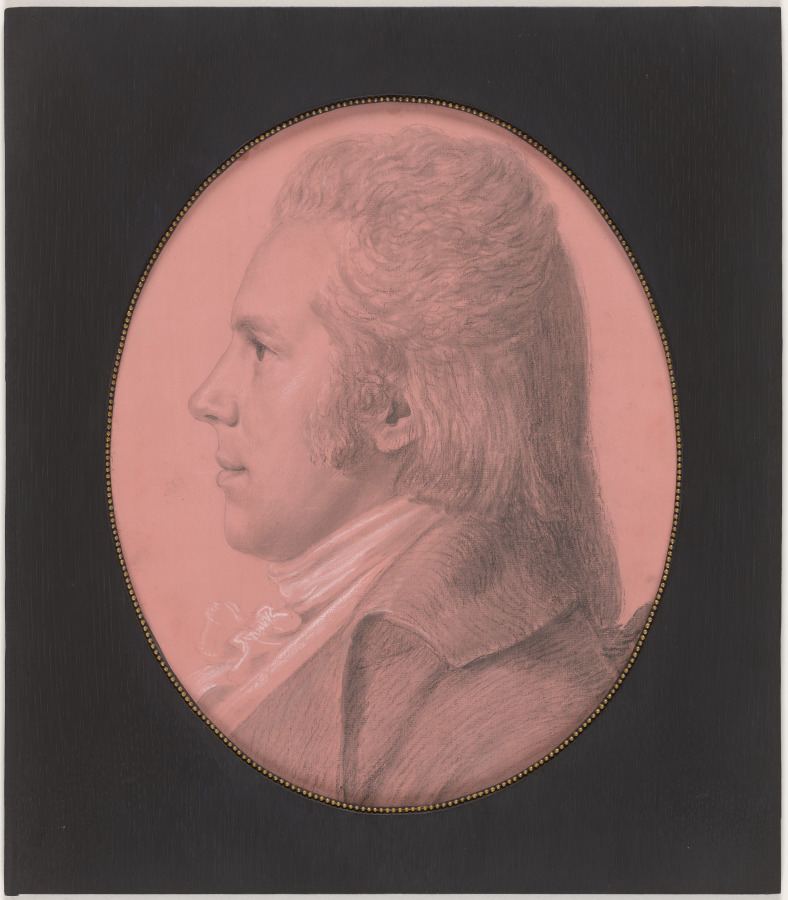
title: Portrait of Georges Arnold Fitzwilliam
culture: France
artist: Charles Balthazar Julien Fevret de Saint-Mémin (French, 1770–1852)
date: c. 1790–1852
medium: Black and white chalk on buff paper with pink wash in original frame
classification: Drawing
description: This portrait and its pair (2024.35.2), depict George Fitzwilliam, an English merchant, and his American wife Eleanor Ramsay Fitzwilliam, who sat in New York for the French émigré artist Charles Balthazar Julien Févret de Saint-Mémin. Saint-Mémin used a recently invented mechanical device called a physiognotrace to trace accurate profiles of his sitters, which he then completed in black and white chalks. The technology enabled Saint-Mémin to establish a thriving business catering to prominent Americans—including Presidents Washington, Adams, Jefferson, and Madison, Benjamin Franklin, and several Native American chiefs—at a time when he was in exile from the French Revolution. As part of each commission, Saint-Mémin also supplied etchings of the portrait in a reduced size, which could be given as keepsakes to family and friends.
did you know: The physiognotrace device used to create this portrait consisted of a wooden frame within which a sitter posed in profile; the artist then peered through an eyepiece and followed the contour and features of the sitter’s face by maneuvering a graphite pencil attached to the mechanism.